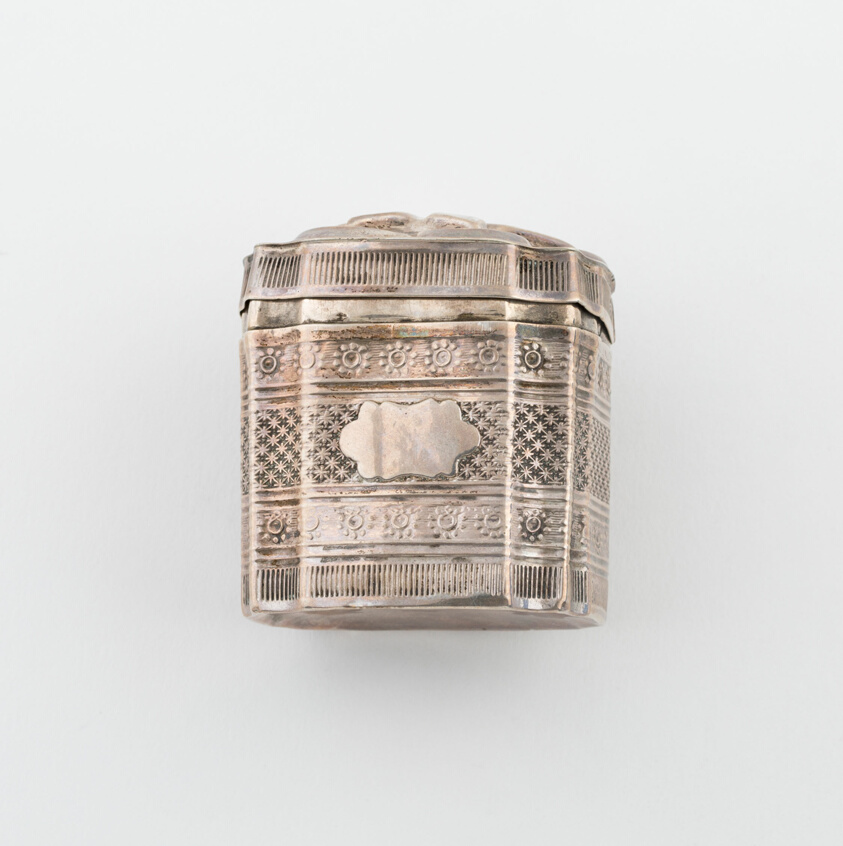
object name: Metalwork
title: Sponge Box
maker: Possibly S. T. Reitsma, Sr.; Dutch, active c. 1859-c. 1892; Possibly Heerenveen/Sneek, Netherlands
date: 1865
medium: Silver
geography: Netherlands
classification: container for personal use; box; european decorative arts; metalwork; silver; decorative object/ornament